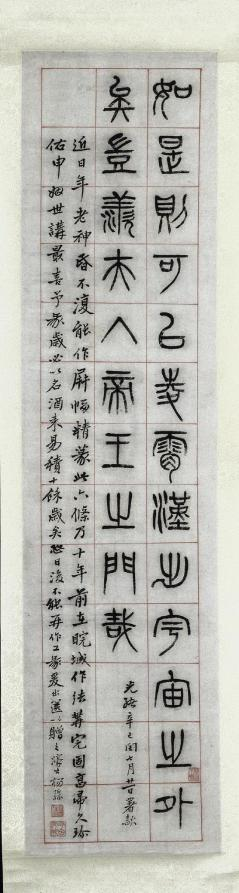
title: On Happiness, Calligraphy in Seal Script Style (zhuanshu)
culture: China, Changsu, Qing dynasty (1644-1911)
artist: Yang Yisun (Chinese, 1813–1881)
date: 1871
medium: hanging scroll, ink on paper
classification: Painting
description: Yang Yisun transcribed this ancient text on six narrow scrolls, starting at the top right and ending at the bottom left. Yang emphasizes the text’s historic nature by using the seal script style found on stone steles and bronze vessels. On Happiness features reflections of a scholar on a leisurely life in the countryside, composed by Han dynasty official Zhongchang Tong, who died the year the Han dynasty collapsed (AD 220). The idyllic life described in the text may bean evocation of the past in a time of national crisis. A decade before Yang wrote these scrolls, Anglo-French forces had looted and burned the Summer Palace in Beijing. At the same time, the domestic Taiping rebellion (1850–64), led by a religious fanatic to overthrow the Qing government, had devastated Yang’s homeland, the Jiangnan region, with an estimated 20 million lives lost.